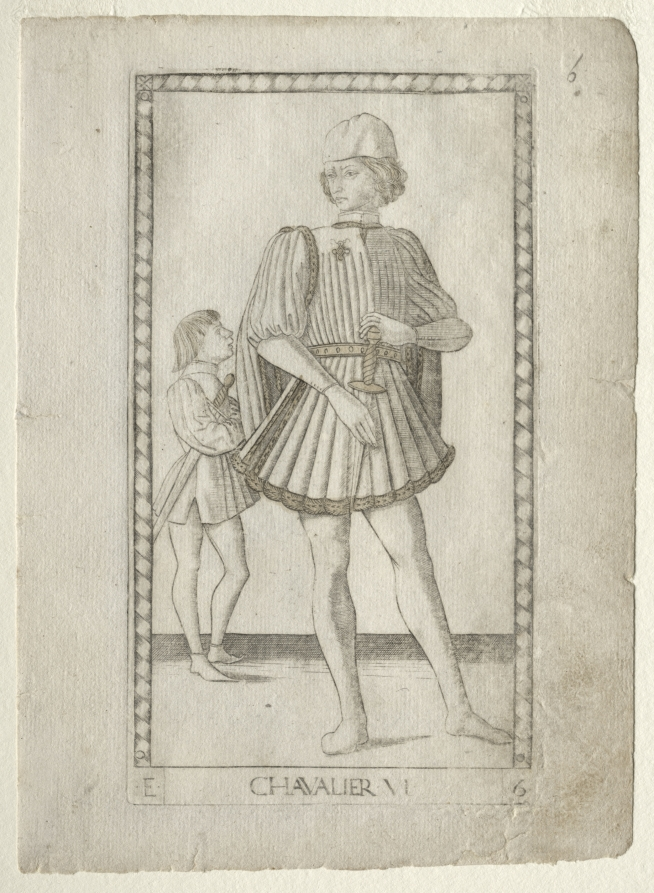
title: The Knight (from the Tarocchi, series E: Conditions of Man, #6)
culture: Italy, Ferrara, 15th century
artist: Master of the E-Series Tarocchi (Italian, active 1460s)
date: before 1467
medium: engraving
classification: Print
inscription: Lettered below the image of Chavalier (The Knight): ·E· / CHAVALIER·VI· / ·6·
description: This engraving is part of the Tarocchi group marked with the letter “E,” and named Conditions of Man. This series outlines the social and hierarchical order of ten characters (Beggar, Servant, Artisan, Merchant, Gentleman, Knight, Doge King, Emperor, and Pope), starting from the lower grade and ending with the most important one. Here, Chavalier (The Knight) is shown as a full-length male figure, turned to the left. The elegantly dressed man is holding a dagger in his hands. Behind him on the left, a servant is carrying a sword.